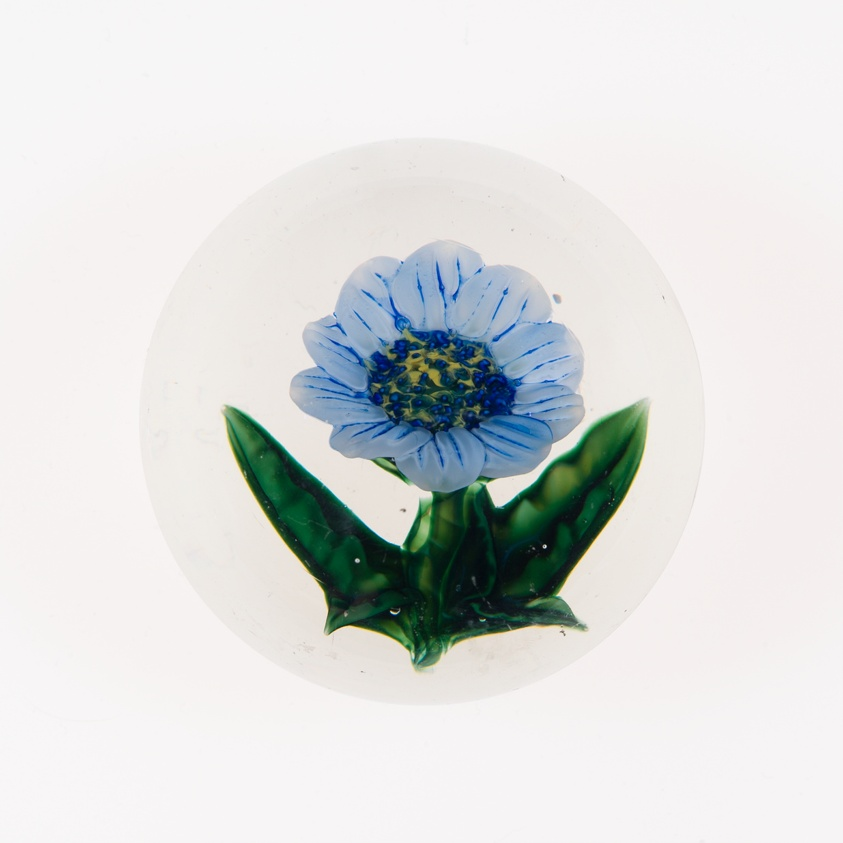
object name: Glass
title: Paperweight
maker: Clichy Glassworks (Cristalleries de Clichy); Clichy, France, 1837-1885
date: 19th century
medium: Glass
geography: Clichy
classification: paperweight; lampwork; european decorative arts; glass